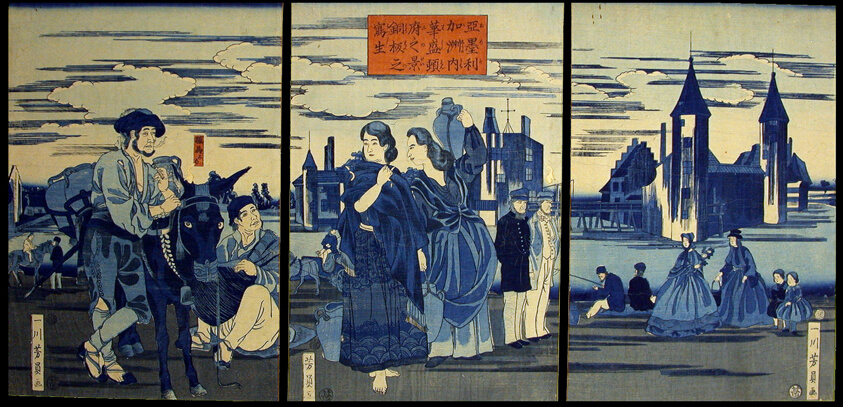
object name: Print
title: Sketch of a Copperplate Print of the City of Washington (Amerika shu no uchi washintonfu no kei doban no utsushi)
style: Japanese (culture or style)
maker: Utagawa Yoshikazu (Japanese, active c. 1850–70)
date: 1861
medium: Color woodblock print; oban triptych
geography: Japan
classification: woodblock print; print; asian art